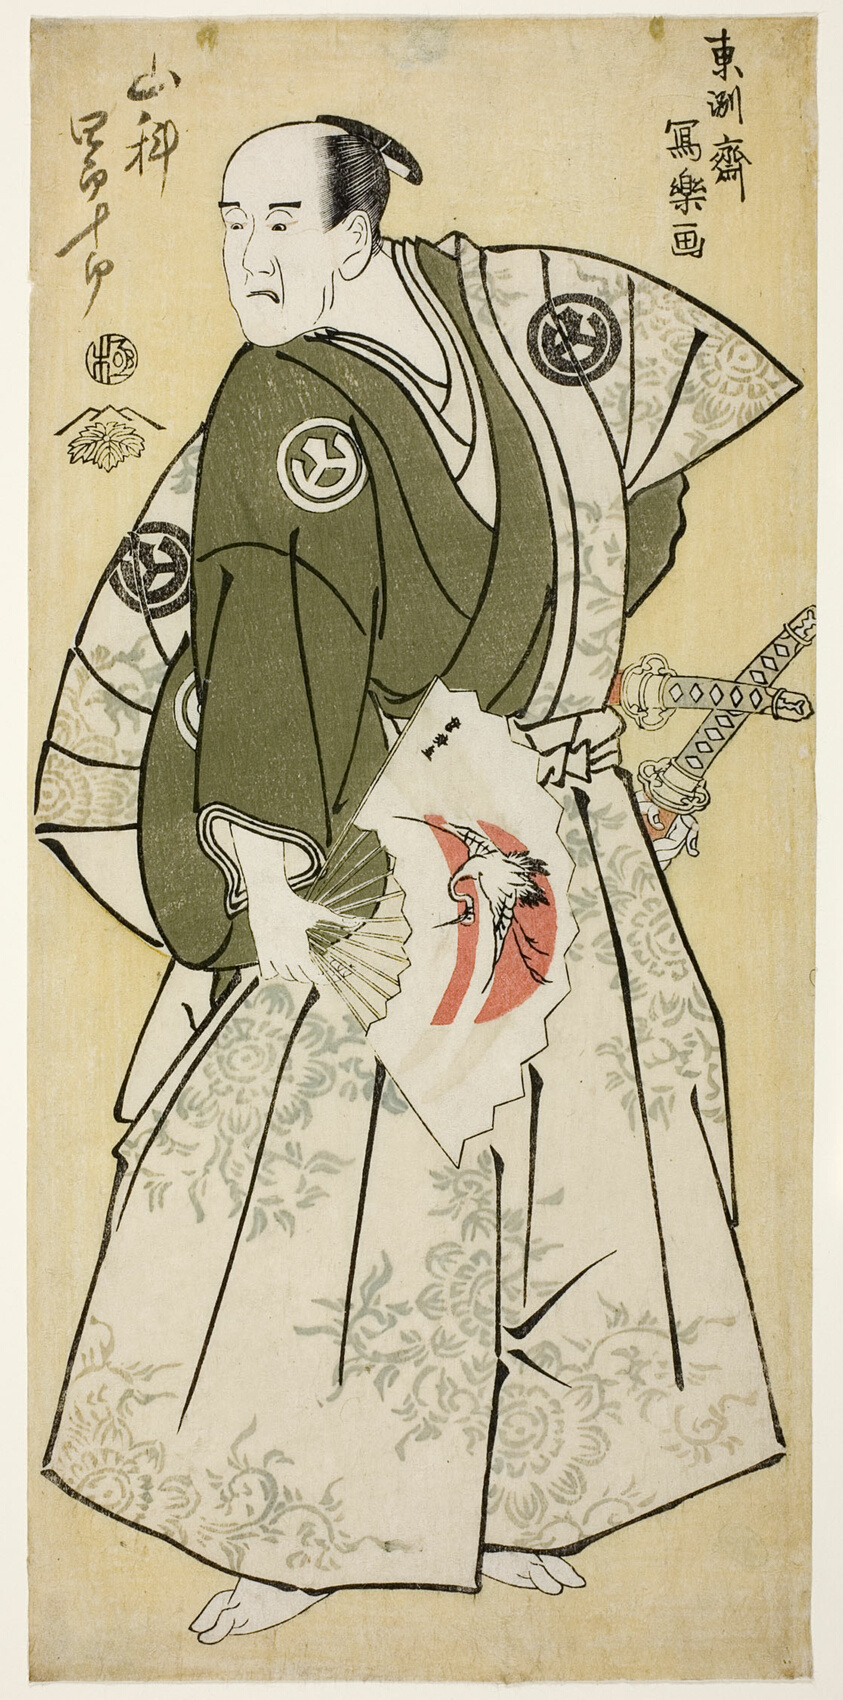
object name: Print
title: The Actor Yamashina Shirojuro as Nagoya Sanzaemon (Yamashina Shirojuro no Nagoya Sanzaemon)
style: Japanese (culture or style)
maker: Toshusai Sharaku 東洲斎 写楽; Japanese, active 1794-95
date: 1794 (Kansei 6)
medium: Color woodblock print; hosoban, nishiki-e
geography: Japan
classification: woodblock print; print; asian art